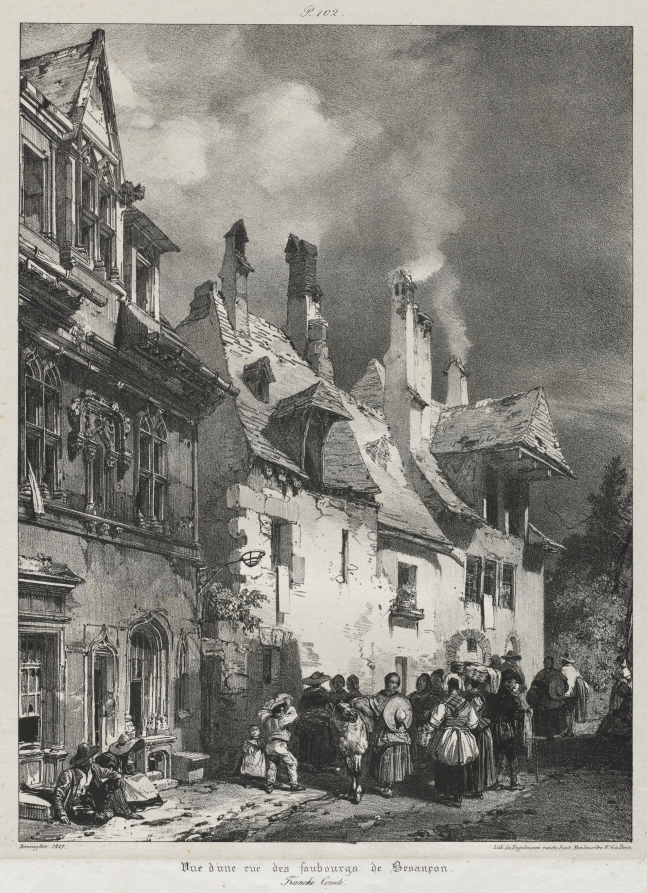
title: Voyages pittoresques et romantiques dans l'ancienne France, Franche-Comté: Vue d'une rue des faubourgs de Besançon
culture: England, 19th century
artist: Richard Parkes Bonington (British, 1802–1828)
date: 1825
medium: lithograph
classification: Print